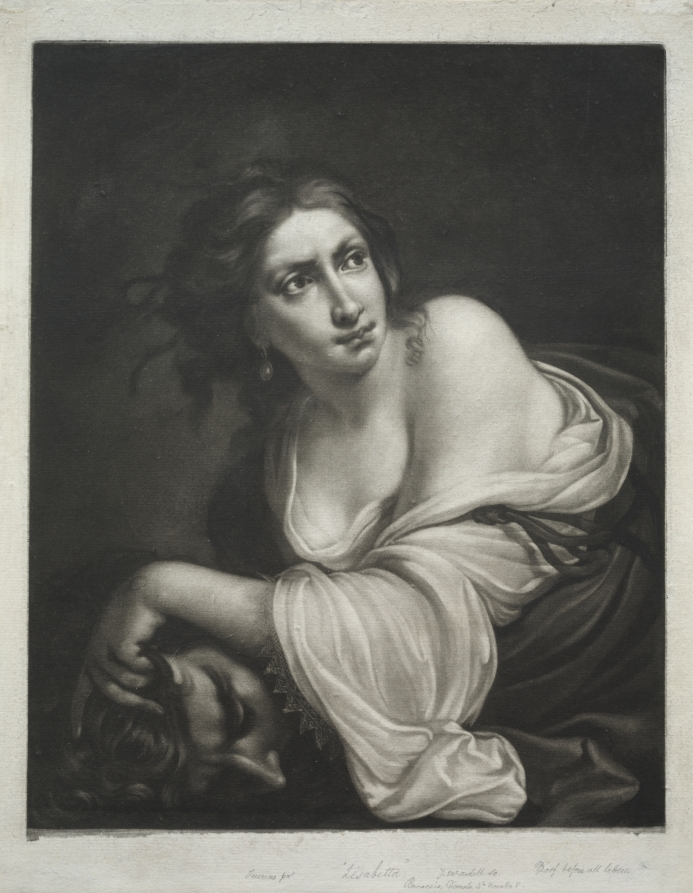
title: Lisabetta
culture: England, 18th century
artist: James McArdell (British, 1728/29–1765)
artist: after Francesco Furini (Italian, 1603–1646)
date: c. 1740–65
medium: mezzotint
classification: Print